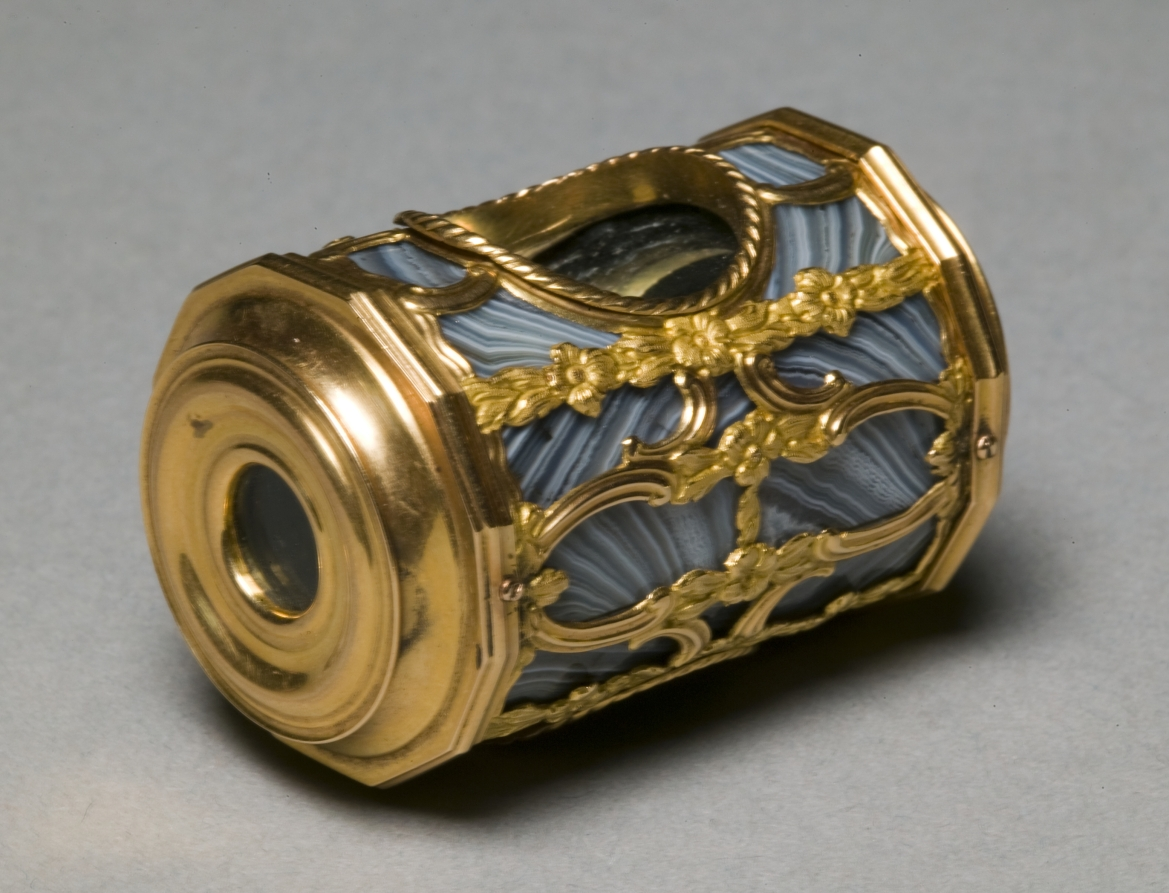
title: Spyglass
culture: England, late 18th century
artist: James Cox (British)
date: c. 1750–60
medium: gold-mounted agate, periscope mirror for side viewing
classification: Miscellaneous